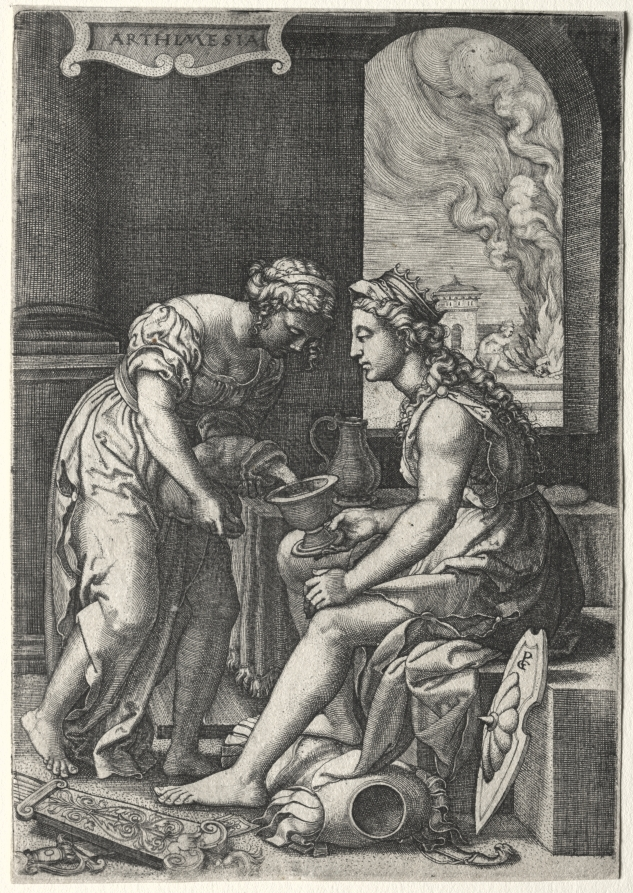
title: Artemisia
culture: Germany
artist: Georg Pencz (German, c. 1500–1550)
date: c. 1539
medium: engraving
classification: Print